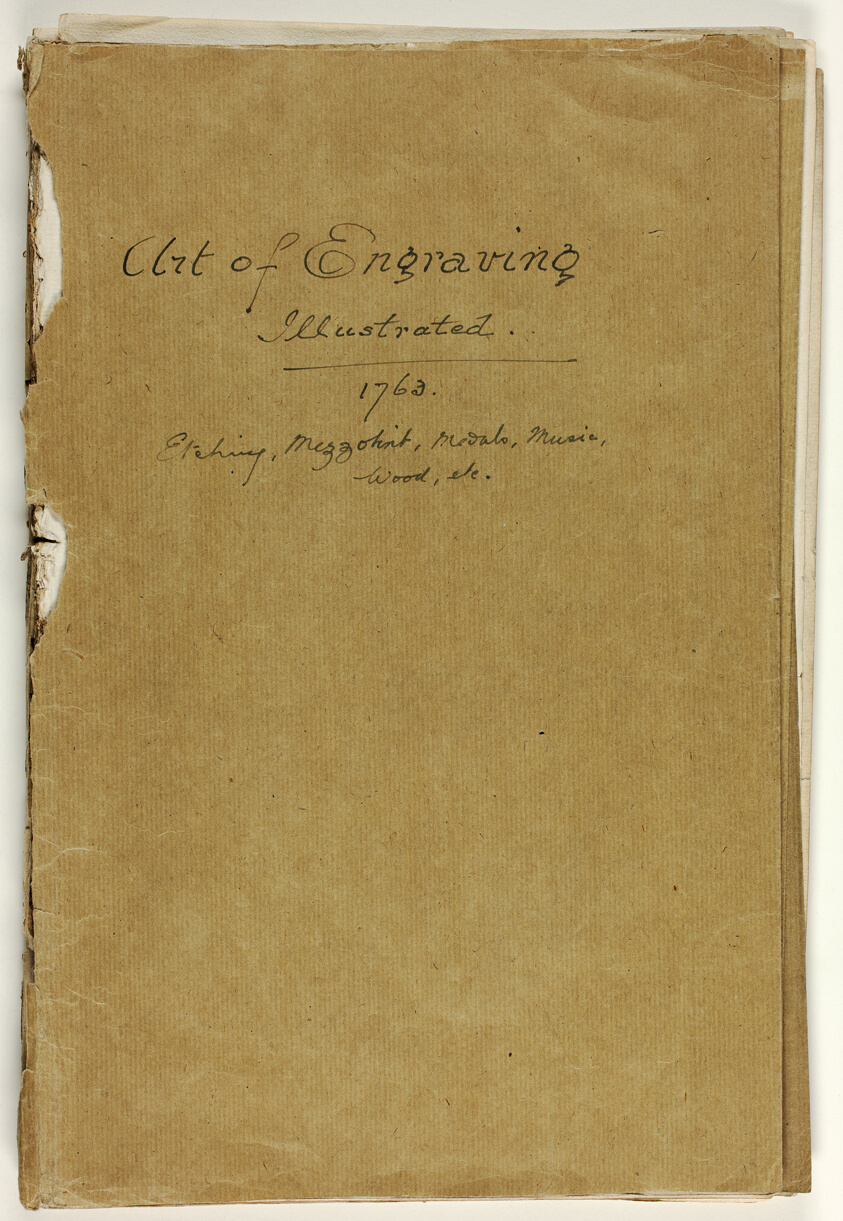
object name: Print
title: Art of Engraving, from Encyclopédie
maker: published by André le Breton (French, 1708-1779); Michel-Antoine David (French, c. 1707-1769); Laurent Durand (French, 1712-1763); Antoine-Claude Briasson (French, 1700-1775)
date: 1751/77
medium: Letterpress in black on cream laid paper with later covers of tan paper; sheets removed from books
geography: France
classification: book; prints and drawing; print